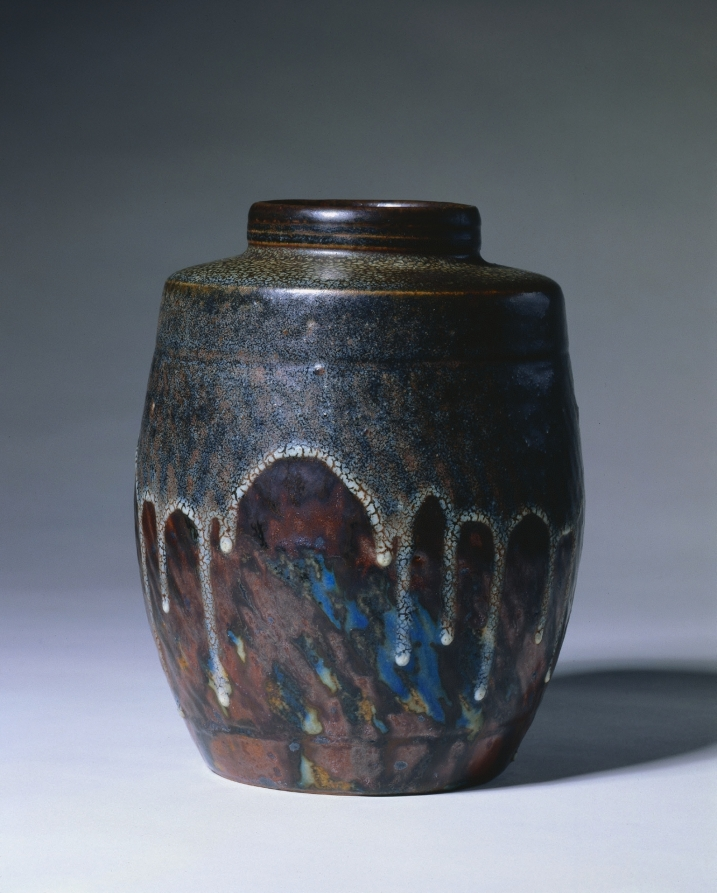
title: Vase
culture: France, early 20th Century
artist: Paul Jeanneney (French, 1861–1920)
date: c. 1900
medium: stoneware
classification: Ceramic